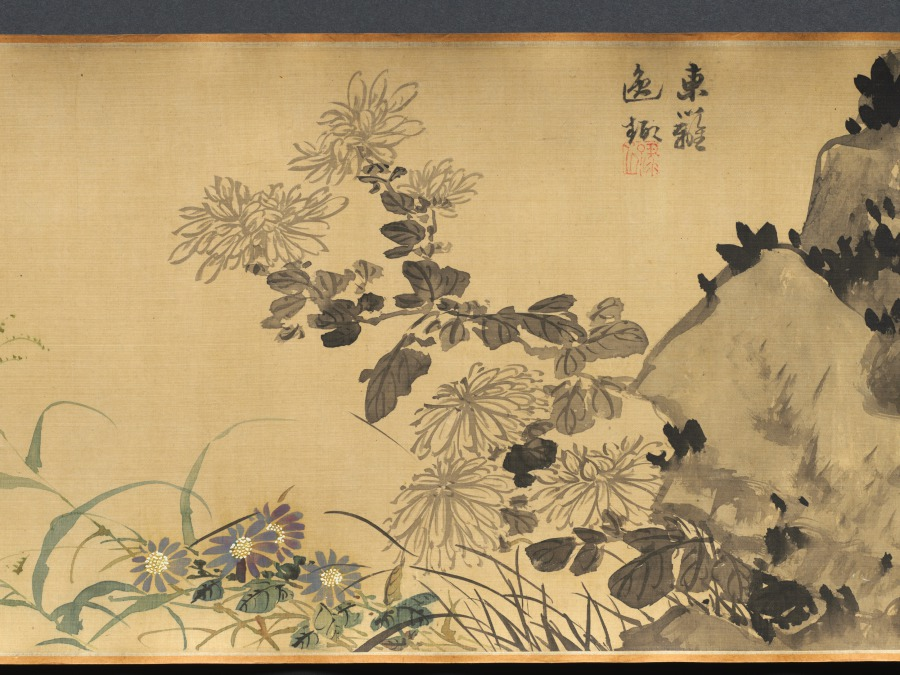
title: Flowers of Four Seasons, with Poems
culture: China, Ming dynasty (1368–1644)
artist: Wang Guxiang (Chinese, 1501–1568)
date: 1531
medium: handscroll; ink and light color on silk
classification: Painting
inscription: Artist's inscription, signature, and 15 seals. Ink Orchids. Sewn as pendants for the man of worth, swaying quiety, fragrance in the valley. [seal] Hsiao-chu ts'un Peony. Wiping his face, the young gentleman Ho [Ho Yen of Wei, Three Kingdoms] appears to have been powdered. His previous life was the perfume-stealing Han Shou [of Chin, 265–419 CE], the fragrance still lingers. [seal] Ts'un-wu chai. Flowering Crab Apple, New Bamboo. Shao-lin [Du Fu, 712–770] had to put down his brush. [Flowering Crab Apple]. Yü-k'o [Wen T'ung, d. 1079) in vain wrote poems about [Bamboo]. [seal] Yu-shih. Lotus Flowers. When she turns her head, half-hidden by a fan, and casts a glance, all the beautiful women become colorless. [seal] K'ang yüeh huai. Loquat. Ripeness in summer. [seal] Lu-chih. Pomegranate Flower. Whenever I remember you I will send my thoughts, but where have you gone--the [skirt] of pomegranate red? [seal] Wu-ho Sheng. Day Lily. Plant the day lily to forget sorrow. [seal] Yu-shih. Chrysanthemum. The untrammelled joy at the eastern fence. [seal] Lu-chih. Begonia. Comparing it to the beauties of Spring, and spreading them out as trimming for the stone steps. [seal] Yu-shih. Hibiscus. In recent years I have always enjoyed looking at flowers; instead of dark red I preferred pink ones. [seal] Jen-sheng i-lou. Narcissus, Camellia. The jade girdle left behind at Lo River. [Narcissus]. The precious pearls glitter before Spring. [Camellia]. [seal] Lu-chih. Heavenly Bamboo (Nandina domestica). A single branch in the wintry season. [seal] K'ang yüeh huai. Plum. Fragrant snow in the Lo-fou Mountains. [seal] Ts'un-wu chai. In the eleventh lunar month of the hsin-mao year of the Jiaqing era [1531], [I] imitated the boneless style of Yüan masters in sketching from life. Guxiang [seals] Yu-shih; Lu-chih. Translated by Wai-kam Ho/Lingyun Shih Liu (1980)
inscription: 2 colophons and 23 additional seals: 1 colophon dated 1632, and 2 seals of Li Jih-hua [Li Rihua] 李日華 (1565–1635); 1 colophon and 2 seals of Xiang Shengmo 項聖謨 (1597–1658); 3 seals of Liang Qingbiao 梁清標 (1620–1691); 6 seals of the Jiaqing 嘉慶 emperor (r. 1796–1820); 9 seals of Ch'eng Ch'i [Cheng Qi] 程琦 (1911–1988)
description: In this painting, flowers are loosely arranged by the seasons: narcissus and peony represent early spring; yellow loquat and lotus, summer; chrysanthemum, autumn; and the plum and evergreen bamboo, winter. The artist added to each flower a poetic line of calligraphy associating each plant with a historic or legendary figure. For example, the chrysanthemum, along with the line “The untrammeled joy at the eastern fence,” refers to the poet Tao Yuanming (died AD 427) who enjoyed chrysanthemums at the eastern fence in his garden. The scroll illustrates Wang Guxiang’s mastery of free brushwork, combining light monochrome ink with transparent colors. In his inscription, Wang says he used the “boneless” style without outlines as developed during the Yuan dynasty (1279–1368). Wang was a native of Changzhou, a city in southeast China known for its rich flora and fauna, and flower-and-bird painting tradition.